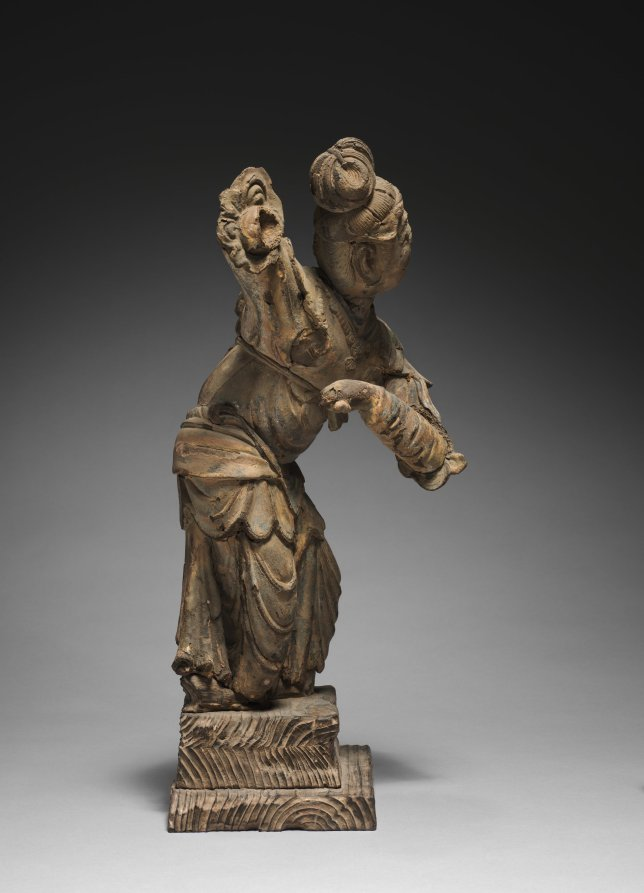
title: Dancing Apsaras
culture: China, late Tang dynasty (618–907) to Five dynasties (907–960)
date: 900s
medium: dry lacquer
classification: Sculpture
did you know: The sculpture was made from a rare technique involving alternate layers of cloth and lacquer, modeled on an armature or around a removable clay core.